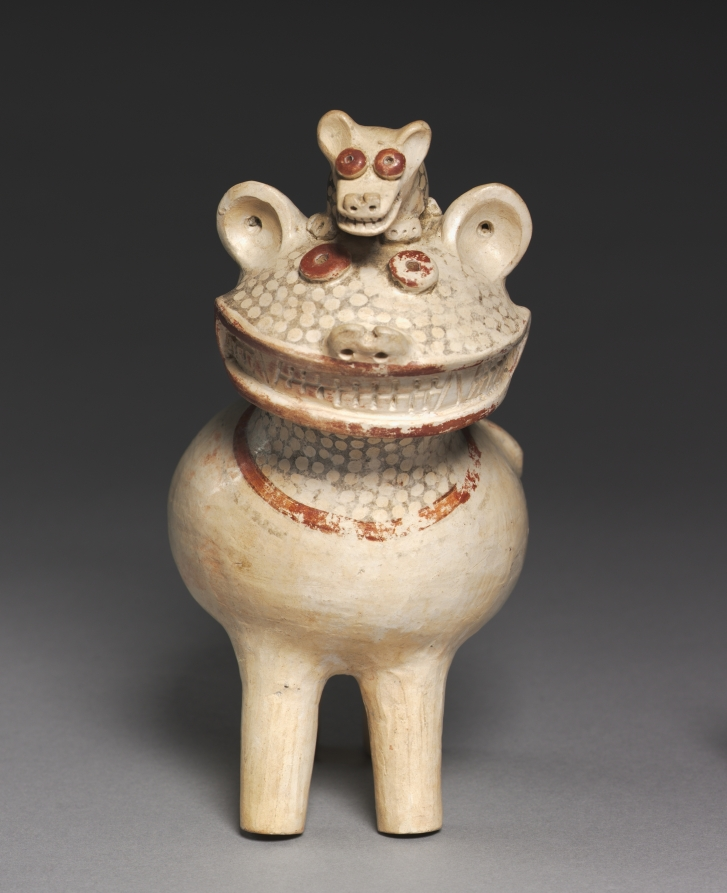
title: Feline Vessel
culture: Central Andes, North Highlands, Recuay people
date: 1–700 CE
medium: ceramic, red and white slips, black pigment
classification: Ceramic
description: Recuay art is under-studied and it is difficult to know the meaning of the wonderfully stylized feline on whose head perches a small passenger that may be a coatimundi, a nosy, busy, racoon-like animal. Elsewhere in Recuay art, felines are shown as virile predators, making it likely that in general they were symbols of leadership. The feline is painted with white and red slips; after firing, a resist application of black pigment was used to create the dotted pattern.